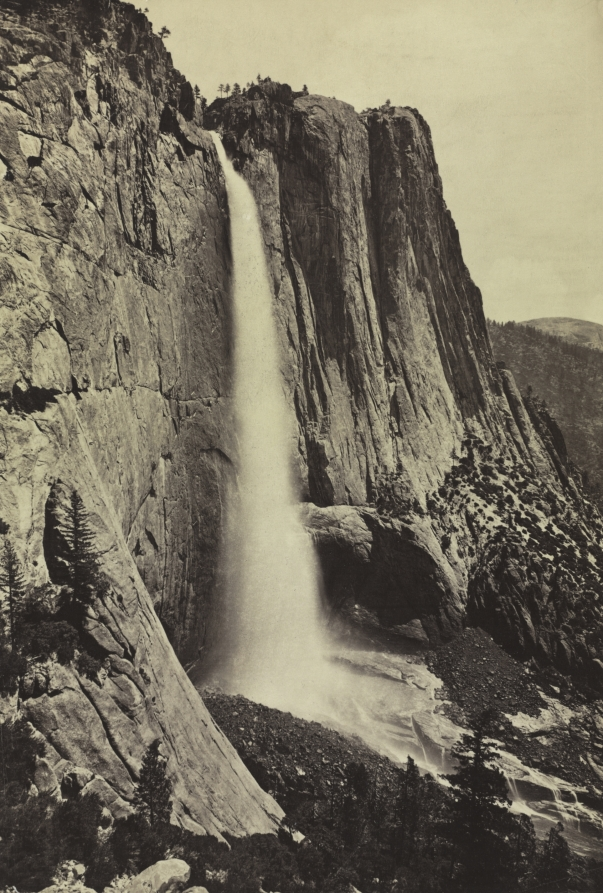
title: Yosemite Falls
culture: America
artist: attributed to Eadweard J. Muybridge (American, 1830–1904)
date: 1868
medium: albumen print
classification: Photograph